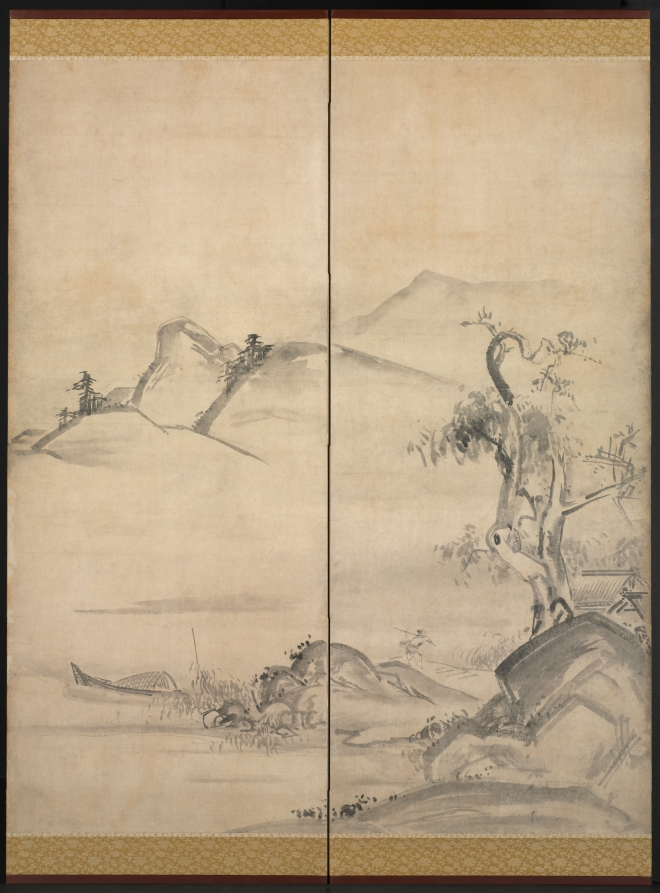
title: Eight Views of the Xiao and Xiang Rivers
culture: Japan, Edo period (1615–1868)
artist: Watanabe Shikō (Japanese, 1683–1755)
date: 1700s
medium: Six-panel folding screen, ink on paper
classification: Painting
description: Watanabe Shiko, an Edo period painter who combined Kano school style with Rimpa style, re-created the Xiao and the Xiang rivers on a pair of eight-panel screens. For this composition, he followed the Kano school’s sense of space, adapted from miniature copying paintings (shukuzu) by the Japanese artist Kano Tanyu. Watanabe revised the typical representations of the Xiao and the Xiang rivers by rendering the theme Wild Geese Descending to Sandbar on the right screen and Evening Bell from Mist-Shrouded Temple on the left screen. He depicted simple motifs—moon, boat, geese, and temple—to suggest the other scenes while also creating airy space.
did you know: This screen forms a pair with CMA 1960.284.